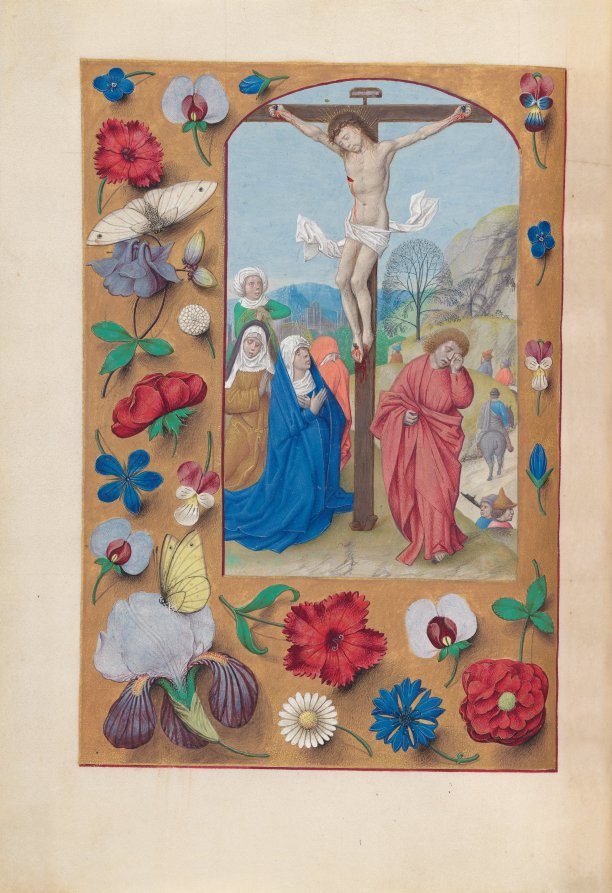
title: Hours of Queen Isabella the Catholic, Queen of Spain: Fol. 72v, Crucifixion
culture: Flanders, Ghent and Bruges, late 15th Century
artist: Master of the First Prayerbook of Maximillian (Flemish, c. 1444–1519)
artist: and Associates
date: c. 1500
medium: ink, tempera, and gold on vellum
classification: Bound Volume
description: This manuscript was illuminated by a circle of at least five highly organized manuscript painters active in the Flemish cities of Ghent and Bruges. The principal illuminator was Alexander Bening, who painted the majority of the book's miniatures. Manuscripts produced by this circle of artists are renowned for the decoration of their borders, which typically feature a rich variety of realistically-painted flowers, birds, and butterflies. This prayer book, called a book of hours, was intended not for a cleric, but for the private devotions of a lay person-in this case, Isabella the Catholic, Queen of Spain (1451-1504). Isabella's coat of arms embellishes the book's frontispiece. It is unlikely that the book was commissioned by the Queen herself; rather, she probably received it as a diplomatic gift from someone courting her patronage, perhaps Cardinal Francisco Jimenez de Cisneros. A Franciscan friar, Jimenez was dependent upon Isabella for his advancement, first to the post of Queen's confessor in 1492, and then to Archbishop of Toledo in 1495.